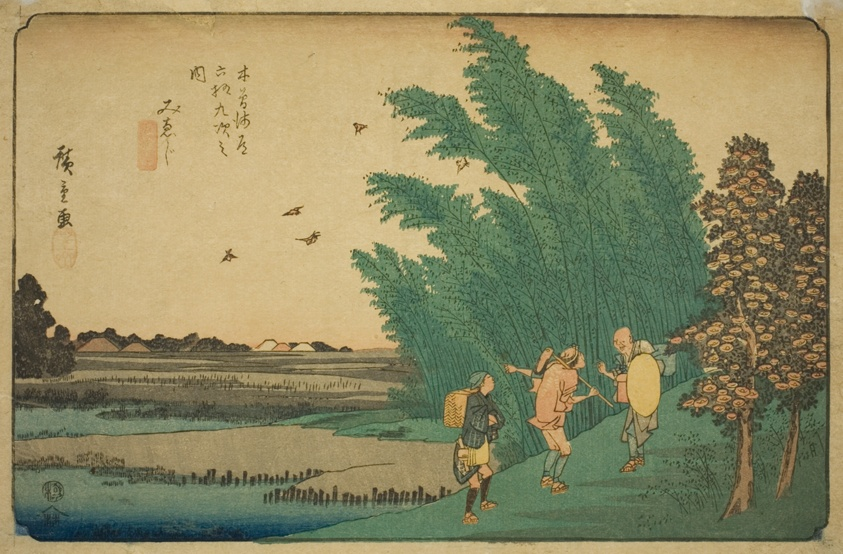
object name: Print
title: No. 56: Mieji, from the series "Sixty-nine Stations of the Kisokaido (Kisokaido rokujukyu tsugi no uchi)"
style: Japanese (culture or style)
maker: Utagawa Hiroshige 歌川 広重; Japanese, 1797-1858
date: c. 1835/38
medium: Color woodblock print; oban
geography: Japan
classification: woodblock print; print; asian art